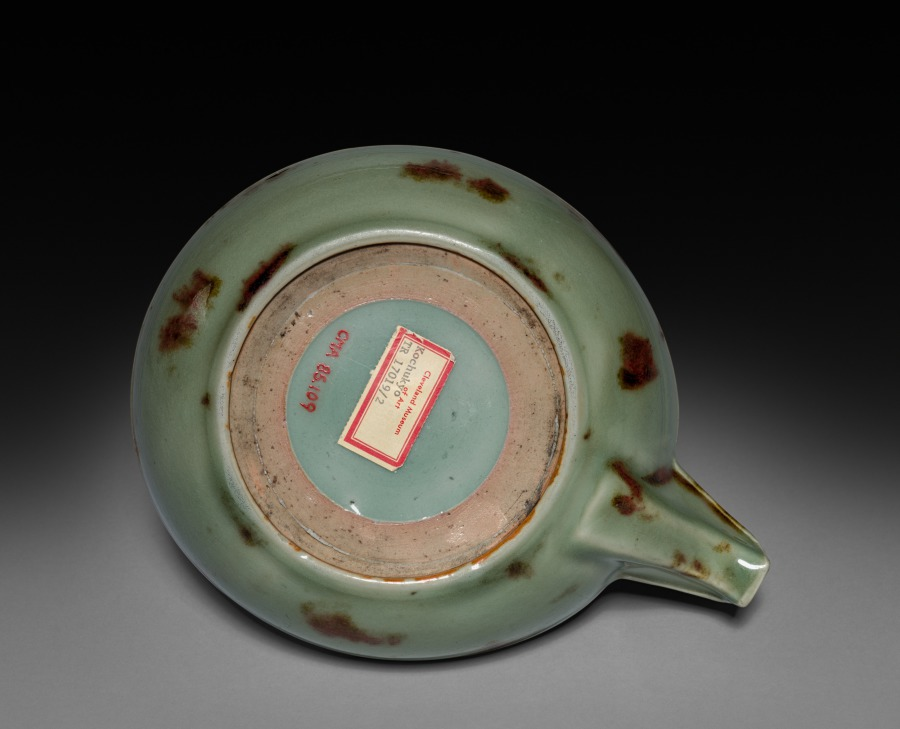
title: Spouted Bowl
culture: China, Zhejiang province, Longquan region, Yuan dynasty (1271-1368)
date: 1300s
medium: Celadon-glazed stoneware spotted with copper red, Longquan ware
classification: Ceramic